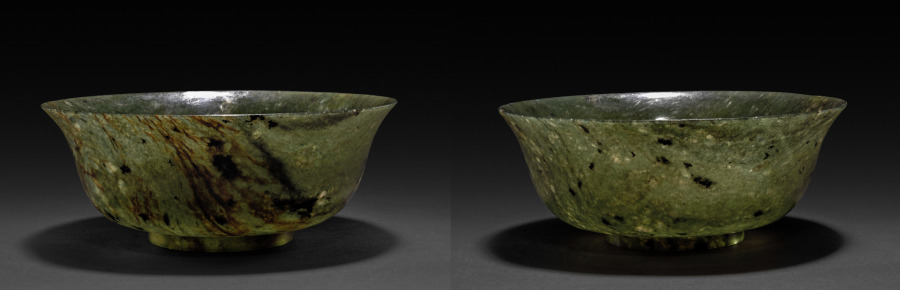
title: Pair of Bowls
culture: China, Qing dynasty (1644–1911), Qianlong reign (1736–95)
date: 1736–95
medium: spinach jade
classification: Jade